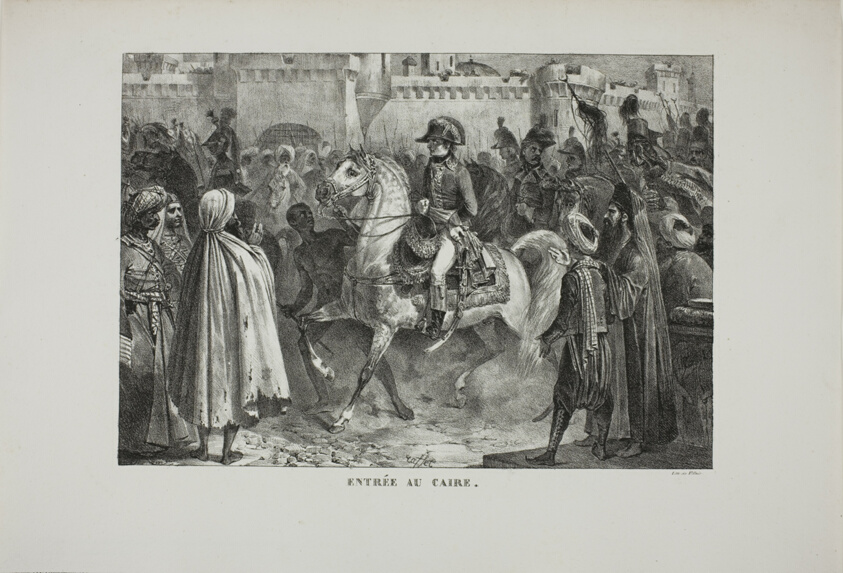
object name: Print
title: Entering Cairo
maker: Denis Auguste Marie Raffet (French, 1804-1860); printed by François le Villain (French, active 19th century)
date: 1827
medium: Lithograph in black on ivory wove paper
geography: France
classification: lithograph; print; prints and drawing